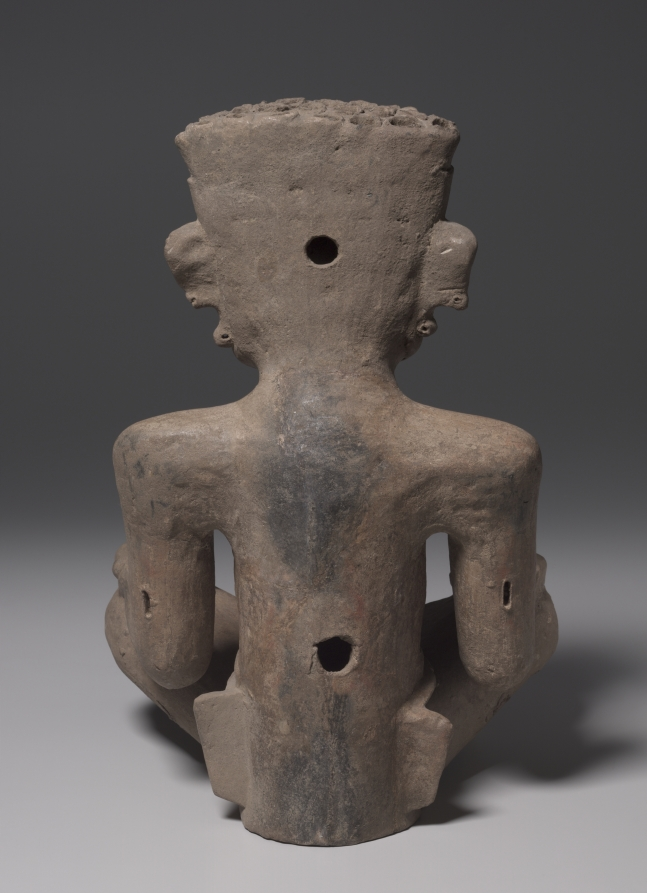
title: Seated Figure Wearing a Skin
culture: Mexico, Gulf Coast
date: 600–1000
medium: earthenware, slip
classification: Sculpture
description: This type of image-showing a human clothed in a sacrificial victim’s skin, visible around the mouth and wrists-is one of the most awesome created by Mesoamerican artists. The figure represents the deity Xipe Totec or a human impersonator. Among the later Aztecs, Xipe was associated with fertility, rain, and renewal. Perhaps the wearer, upon shedding the skin, was conceived as a sprout emerging from a withered husk. Xipe also had military connections.